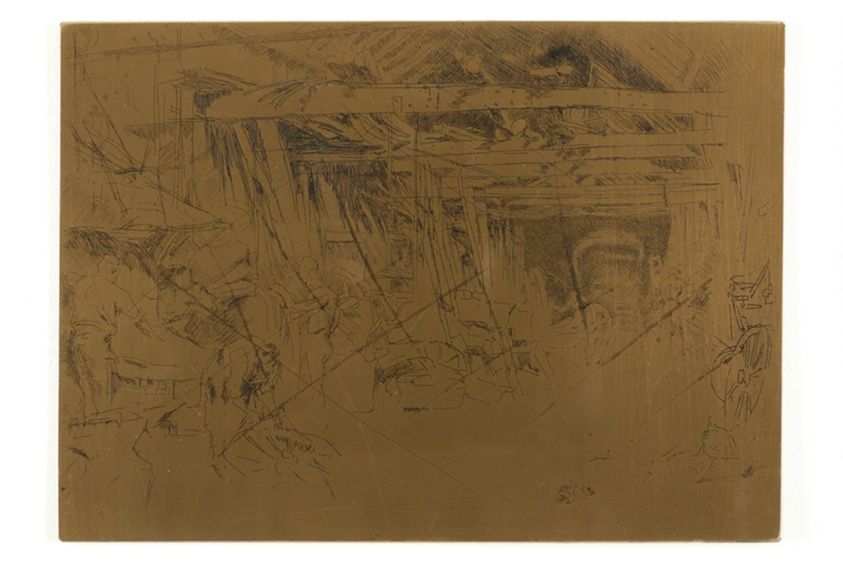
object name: Print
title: Wheelwright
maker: James McNeill Whistler (American, 1834-1903)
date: 1880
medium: Cancelled copper plate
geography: United States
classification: copper plate; prints and drawing; matrix; etched plate; print